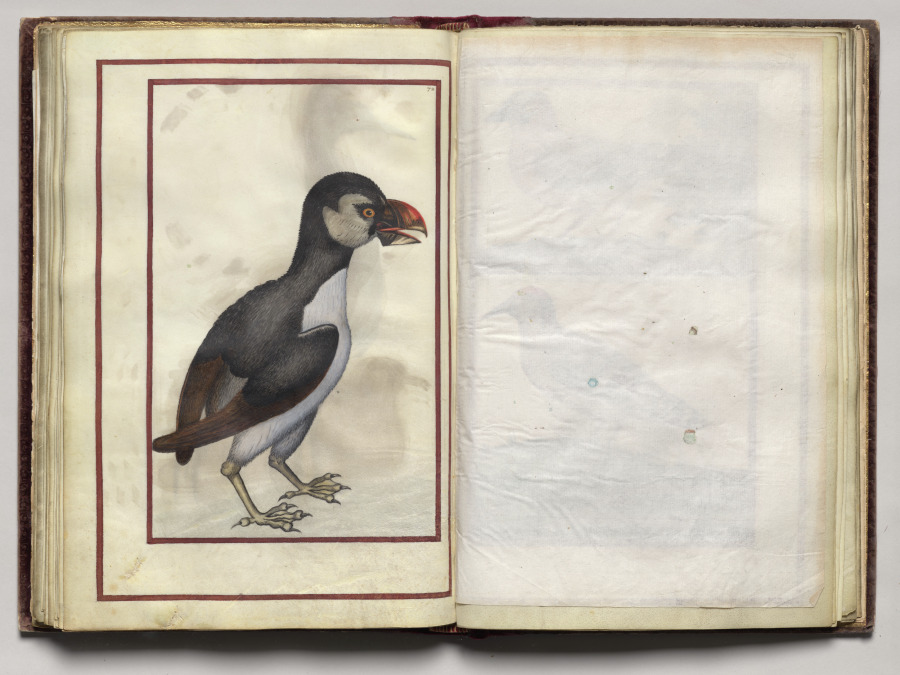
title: Brown and Gray Bird, folio 36 (verso), from Florilegium (A Book of Flower Studies)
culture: France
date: 1608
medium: watercolor, ink, silver, and gold over occasional traces of pencil, on vellum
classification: Bound Volume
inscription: Dated: Poitiers 1608 (on frontispiece) Signed: On frontispiece in black ink, lower right: Van Kuyk Notation on drawing: Frontispiece: in pencil, lower margin: * élève de Van Kessel, peintre flammand (* in pencil also appears in front of Van Kuyk's name).